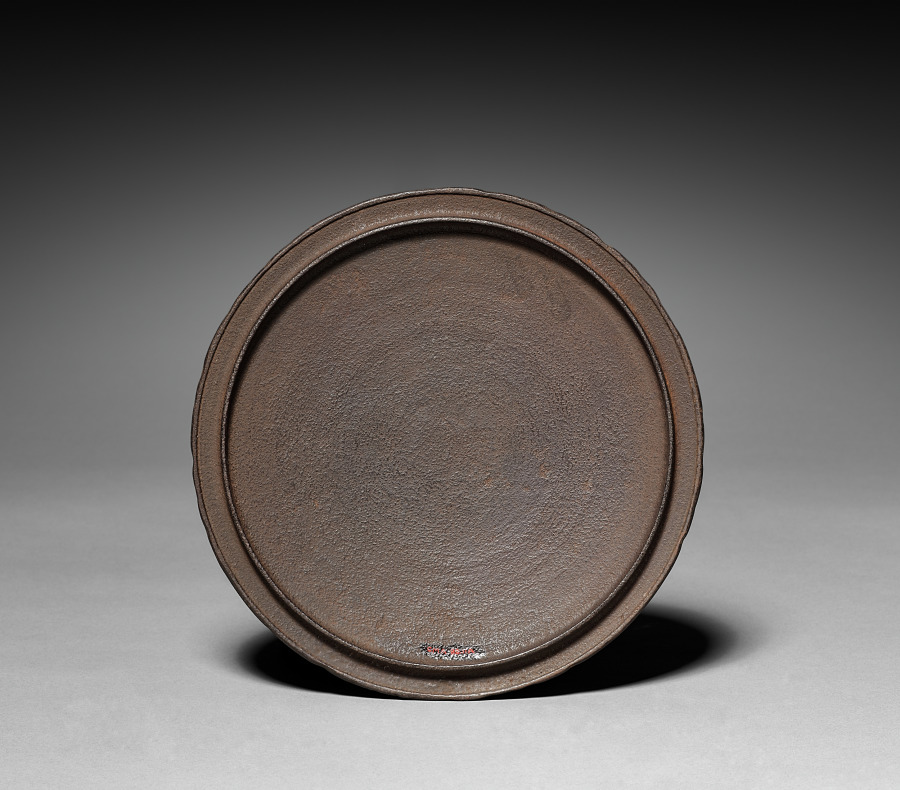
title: Kettle with Crane Design (lid)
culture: Japan, Muromachi period (1392–1573)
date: 1392–1573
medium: iron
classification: Metalwork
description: Water supplied from a jar such as the fine Shino-ware vessel (CMA 1972.9.a-b) was transferred to an iron kettle for boiling as part of the tea ceremony. Former CMA director Sherman Lee described the jagged, broken skirt of this kettle as "attractively damaged," complementing the unobtrusive wispy designs on its rough metal surface. The character of this kettle—worn, coarse, the "perfection" of symmetry destroyed—was cherished by tea masters for its powerful humility.